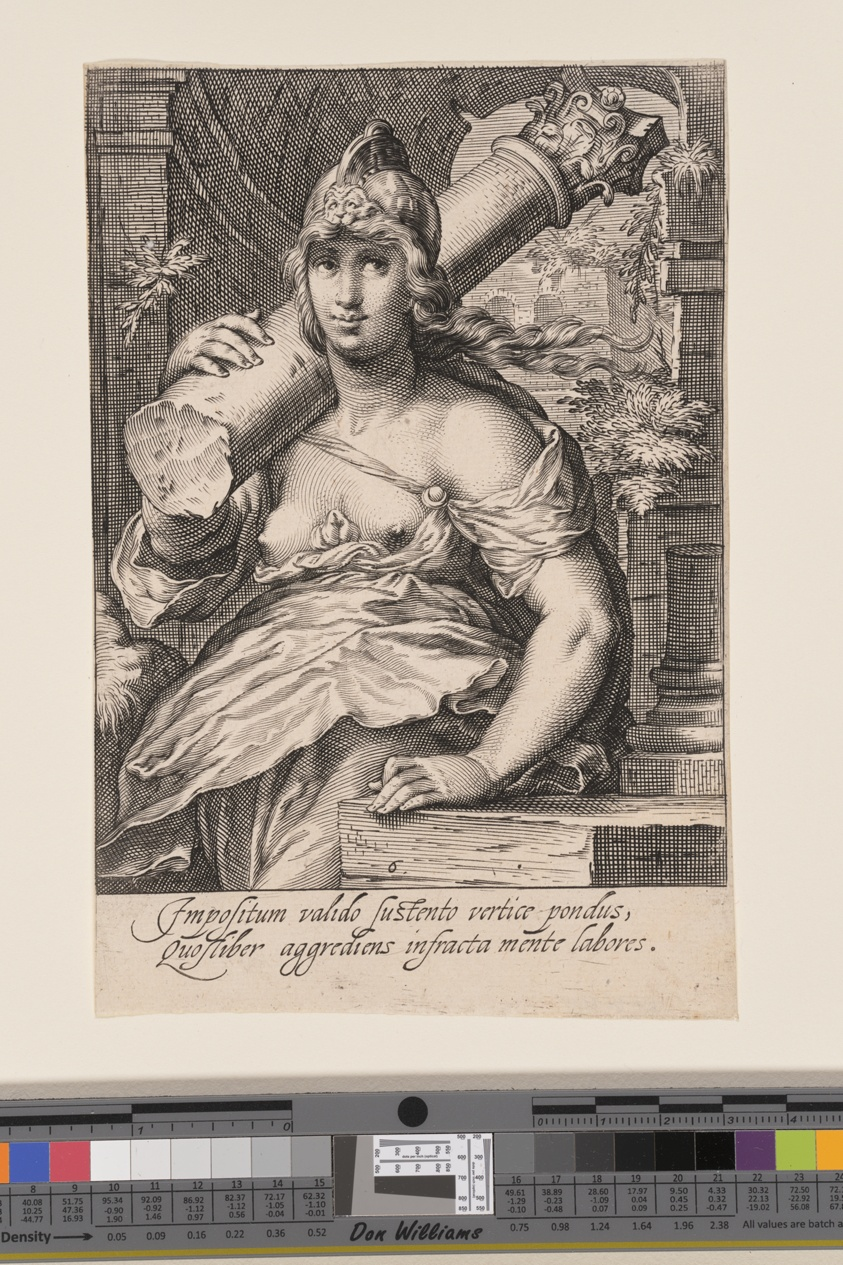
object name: Print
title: Fortitude, from The Seven Virtues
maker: Jacob Matham (Dutch, 1571–1631); after Hendrick Goltzius (Dutch, 1558–1617)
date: 1597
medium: Engraving on paper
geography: Netherlands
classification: engraving; paper; print; prints and drawing